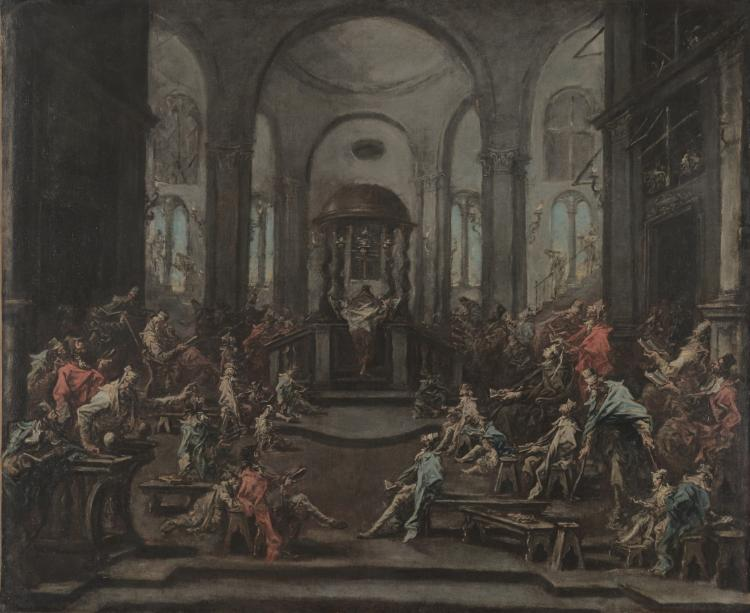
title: Interior of a Synagogue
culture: Italy, 18th century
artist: Alessandro Magnasco (Italian, 1667–1749)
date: c. 1725–35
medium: oil on canvas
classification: Painting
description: The Jewish synagogue was among Magnasco's most frequently painted subjects, here presented in a mystical and imaginative way. Expansive architectural space creates room for a multitude of tiny, fantastical figures with elongated limbs. These characters respond to the service with emotion and expressive gestures. Flashes of light dash across the surface against a dark, muted palette of earthy tones suggesting an otherworldly presence. The composition invites the viewer to enter the space and experience the service. Though he used characteristic elements of Baroque composition and was strongly influenced by Venetian painting, Magnasco's loose brushwork, elongated figures, and mysterious subject matter set him apart. Magnasco peers into a world of which he was not part: he was not Jewish and probably perceived Jews as outsiders. At the dawn of the Enlightenment in Europe progressive aristocratic families commissioned paintings by Magnasco, suggesting the painter's support for Enlightenment ideals which included religious tolerance, but Magnasco's personal views on Judaism in Italy remain unknown.